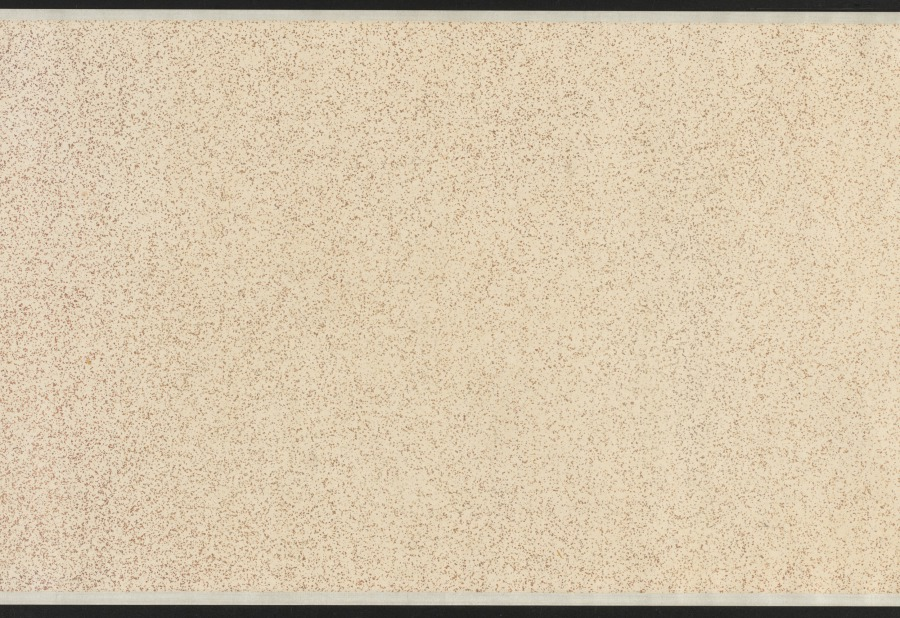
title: Nine Songs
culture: China, Yuan dynasty (1271-1368)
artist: Zhang Wo (Chinese, active c.1336–after 1364)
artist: Chu Huan (Chinese, active 1361)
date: 1361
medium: handscroll; ink on paper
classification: Painting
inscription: 7 colophons and 47 seals: 1 colophon, dated 1361, and 28 seals of Chu Huan 褚奐 (active c. 1361); 1 colophon, dated 1785, and 1 seal of Lu Shihua 陸時化 (1714-1779); 2 seals of Lu Yü-ch'ing (18th c.); 1 colophon, dated 1935, of Ye Gongchuo 葉恭綽 (1881-1968); 1 colophon, dated 1935, of Wu Hufan 吳湖帆(1894–1968); 1 colophon, dated 1938, and 1 seal of Wang Tongyu 王同愈 (1856-1941); 1 colophon, dated 1941, of Wu Huayuan 吳華源 (1893-1972); 1 colophon, dated 1942, and 9 seals of Xu Bangda 徐邦達 (1911–2012); 1 colophon, dated 1942, of Lang Jingshan 郎靜山 (1892-1995); 1 colophon, dated 1944, of Tang Yun 唐雲 (1910-1993); 6 seals of Wang Jiqian [C.C. Wang] 王季遷 (1907–2003).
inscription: Text of The Nine Songs written by Chu Huan at the end of each section.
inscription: 右離騷九歌圖，宋龍溟居士李公本，淮南張渥叔厚所畫妙絕當世。家藏請予書其辭目識于左。至正二十一年辛醜三月旦河南褚奐記。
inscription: Colophon by Lu Shihua 陸時化 (1714–1789): This scroll is fortunate to have been handed down from collections of the right people. Now, after 500 years, its condition is as good as when it was painted. I acquired this from Mr. Shen Guiyu [1673-1769], the President of the Board of Rites. The label is in his handwriting when he was 95 years old. I submit that Chu Huan (t. Shiwen) of the Yuan Dynasty was a native of Qiantang. His "seal" and li writings are in the style of Wu Rui. For example, in [Chu Kuei's] Ming ji lu [A list of masterpieces] is recorded the stele commemorating the restoration of the prefectural school of Kun-shan, the text of which was composed by Yang Weizhen in the twenty-first year of Zhizheng [1361]; and the calligraphy as well as the title in li style was by Chu Huan, who was at that time an assistant judge of the prefecture of Haining in the circuit of Hangzhou. Zhang Wo's zi is Shuhou (叔厚). His literary name is Zhen Qisheng (贞期生). According to [Gu Ying's] Yu shan cao tang ya jii, he liked to paint in the bai-miao or the "pure delineation" style after the method of Li Longmian [Li Gonglin 李公麟], which finds no peer among the ancient masters. This is agreed upon [by Pei Ch'iung] in his Qing jiang zhi who praised [Zhang Wo] as being quite learned and well-versed in many branches of the arts, especially figure painting. Recorded by Lu Shihua [The mountain dweller], listening to the pine, in the twelfth month of the yisi year [1785].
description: Painted in the baimiao, or fine-line drawing style, this ancient work demonstrates the literati’s use of abstract calligraphic brushwork for self-expression. The subject of the “Nine Songs”—songs associated with shamanistic rituals in the ancient Chu kingdom—had traditionally provided artists with myths and legends that they could explore and reinterpret in their own works.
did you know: Divided into eleven sections, the scroll contains illustrations by painter Zhang Wu followed by a transcription of the relevant verse by calligrapher Chu Huan.